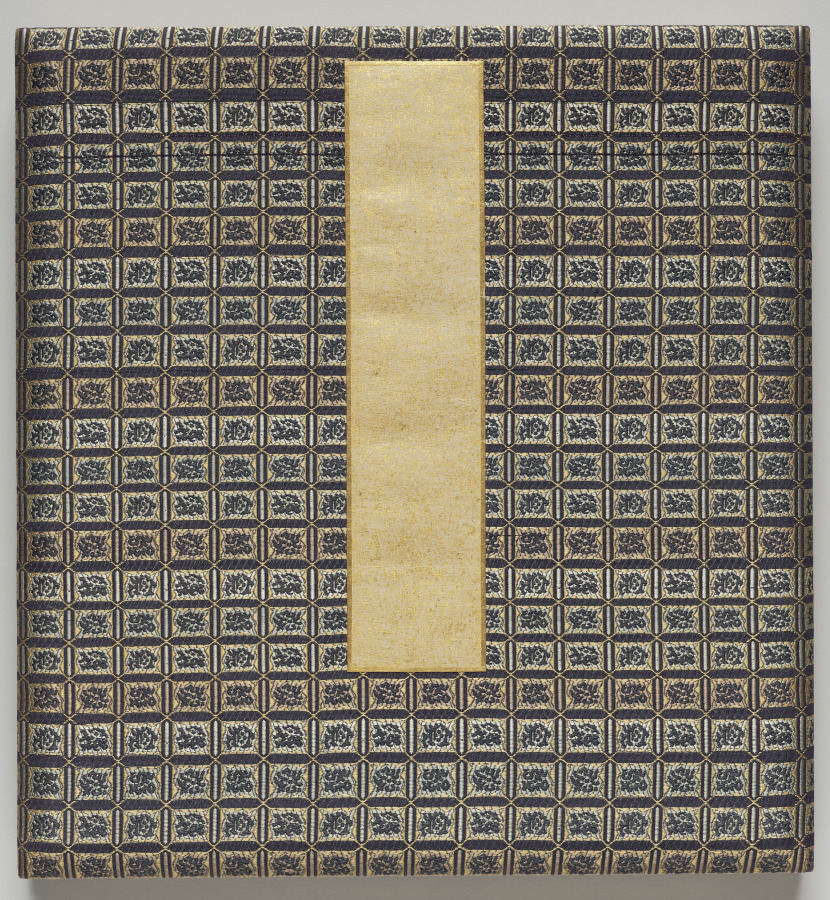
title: Album of Paintings by the Venerable Zeshin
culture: Japan, Edo period (1615–1868)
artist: Shibata Zeshin (Japanese, 1807–1891)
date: 1847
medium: accordion-style album of 12 leaves; ink, color, and gold on silk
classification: Bound Volume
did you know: Textile covers for albums help protect the works of art inside and add to their appeal--the title slip for this album has been left blank.